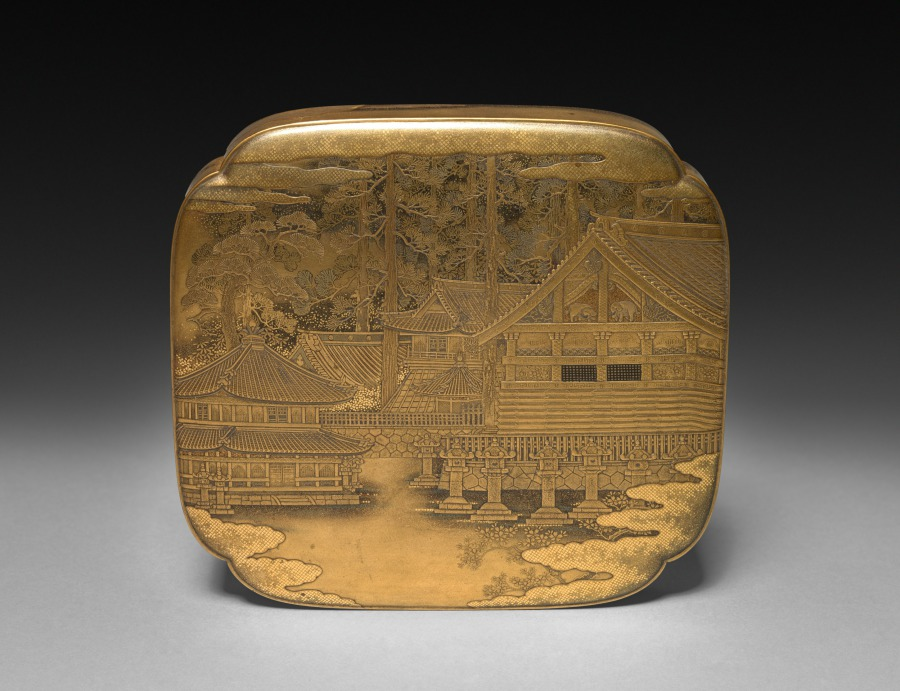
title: Box (lid)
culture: Japan, Meiji period (1868–1912)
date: late 1800s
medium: wood with lacquer and gold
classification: Lacquer